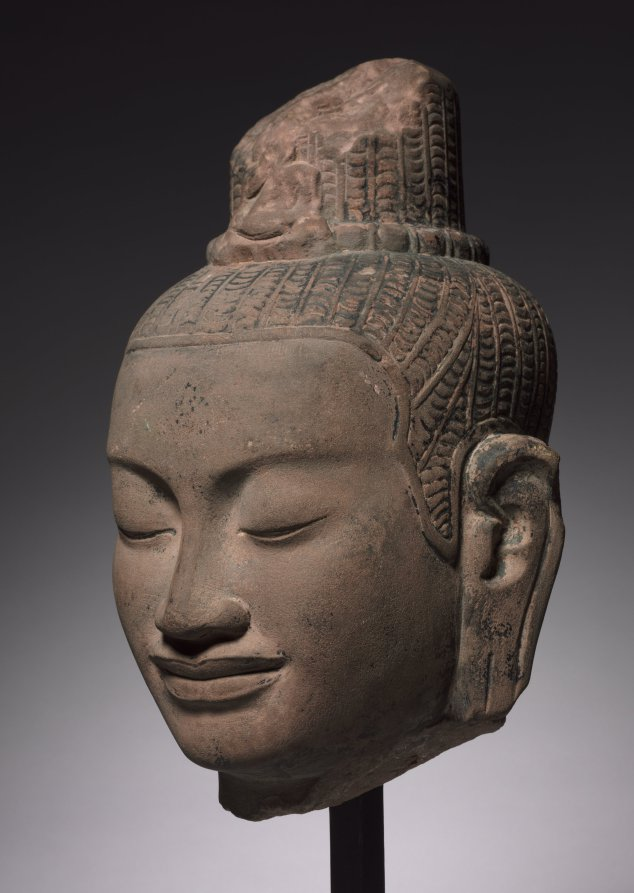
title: Head of Lokeshvara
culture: Cambodia, reign of Jayavarman 7th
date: late 1100s–early 1200s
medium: Sandstone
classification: Sculpture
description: At Banteay Chhmar, none of the three-dimensional stone sculptures that were installed in the temple buildings remain standing. Only fragments of five stone sculptures of Lokeshvara have been found, and more may be recovered with future clearing of the site. This head is stylistically similar to the ones from Banteay Chhmar and is of the type made throughout Cambodia during the reign of Jayavarman VII. Lokeshvara was the form under which his father was apotheosized and venerated. Traces of black lacquer on the stone’s surface remain from when the head was probably refashioned into another image, likely reused for other Buddhist groups who became influential in the post-Angkorian period whose main focus was the historical Buddha rather than Lokeshvara. The lacquer, however, preserved the stone carving beneath, and it shows how the face of the bas-relief of the ten-armed Lokeshvara from Banteay Chhmar would have looked, had it not become eroded by exposure to the elements. The downcast eyes have a compassionate and meditative gaze, while the mouth smiles gently in the confidence of the power of his mercy. The small figure of a seated Buddha in front of the topknot of hair confirms his identity as Lokeshvara.